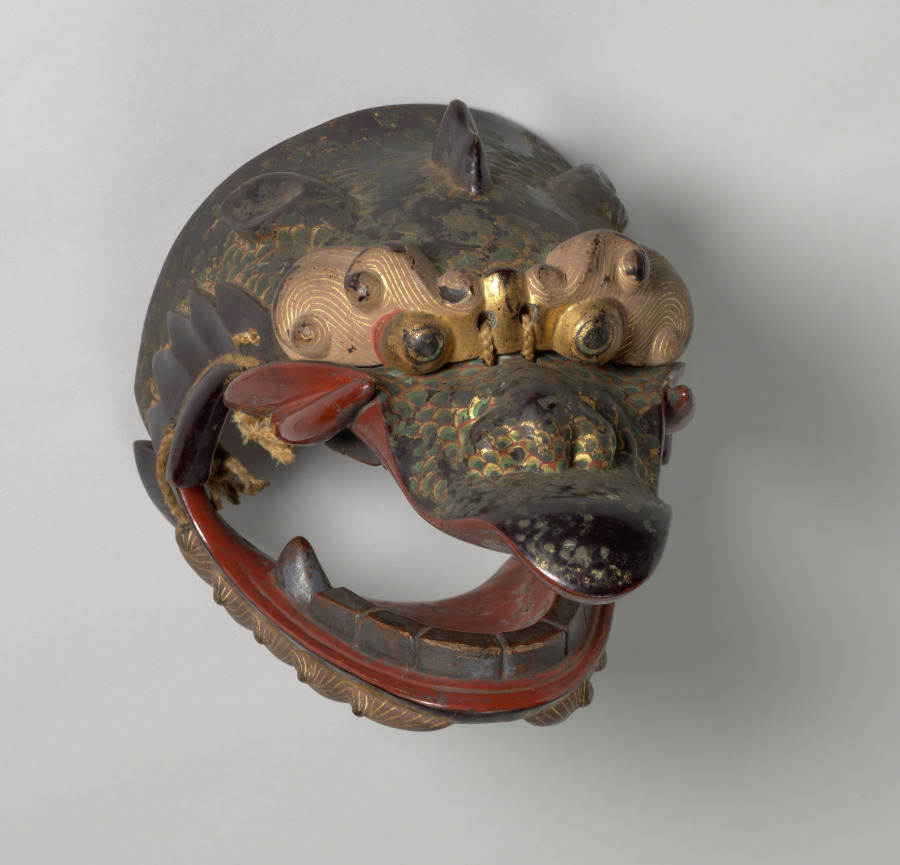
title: Shoulder Piece for a Gigaku Costume in the Form of a Dragon Head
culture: Japan, Kamakura period (1185–1333)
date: 1200s–early 1300s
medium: lacquered wood with color and gold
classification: Sculpture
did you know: This dragon head is made of three pieces of carved lacquered wood with movable jaws fastened with twine.